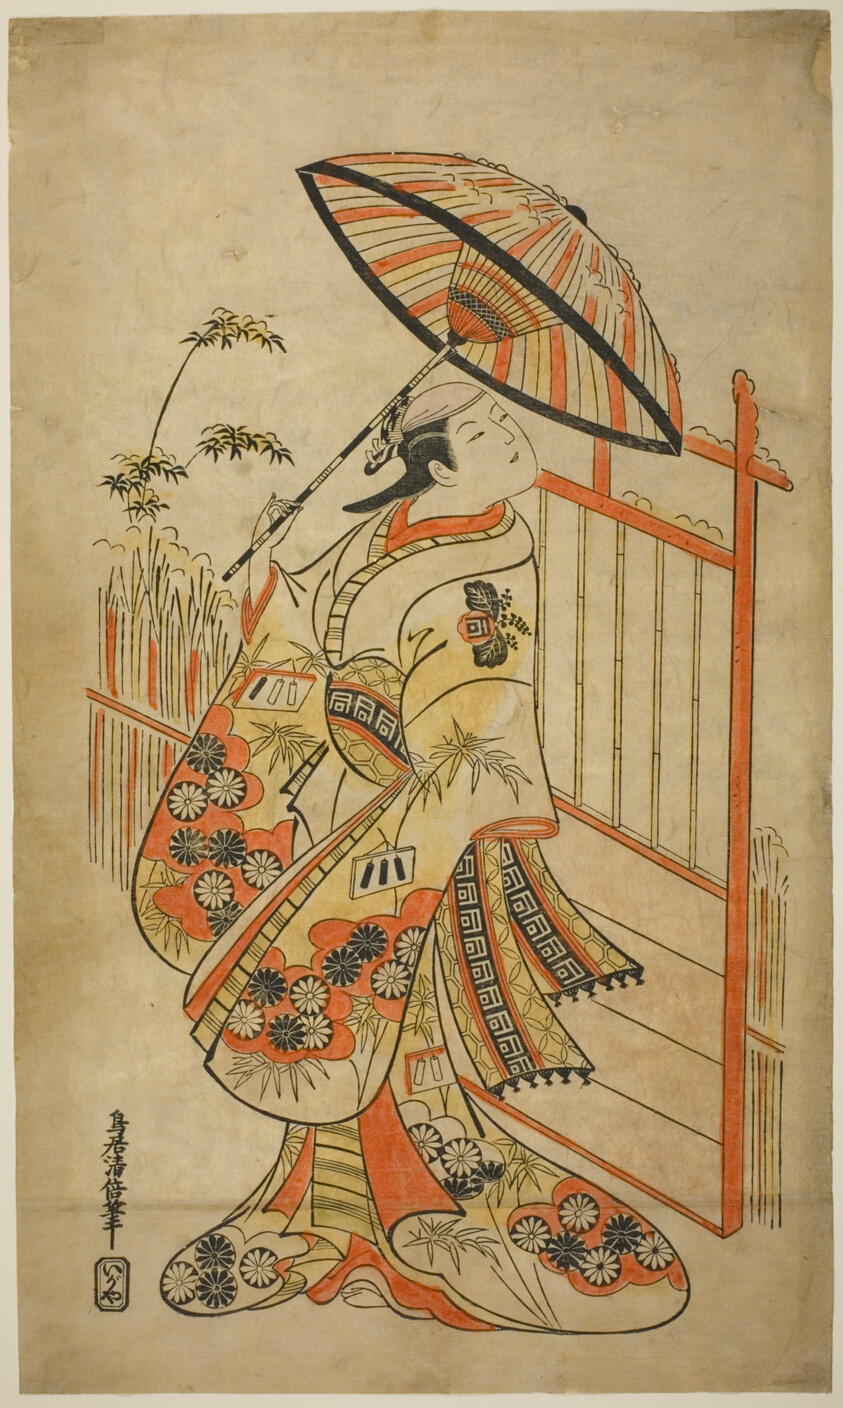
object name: Print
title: The Actor Sanogawa Mangiku I as Sanada, the daughter of the spinner Itoya, in the play "Hiragana Yomeiri Izu Nikki," performed at the Nakamura Theater in the eleventh month, 1718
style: Japanese (culture or style)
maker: Torii Kiyomasu II (Japanese, 1706 (?)–1763 (?))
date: 1718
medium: Hand-colored woodblock print; o-oban, tan-e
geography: Japan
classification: woodblock print; print; asian art